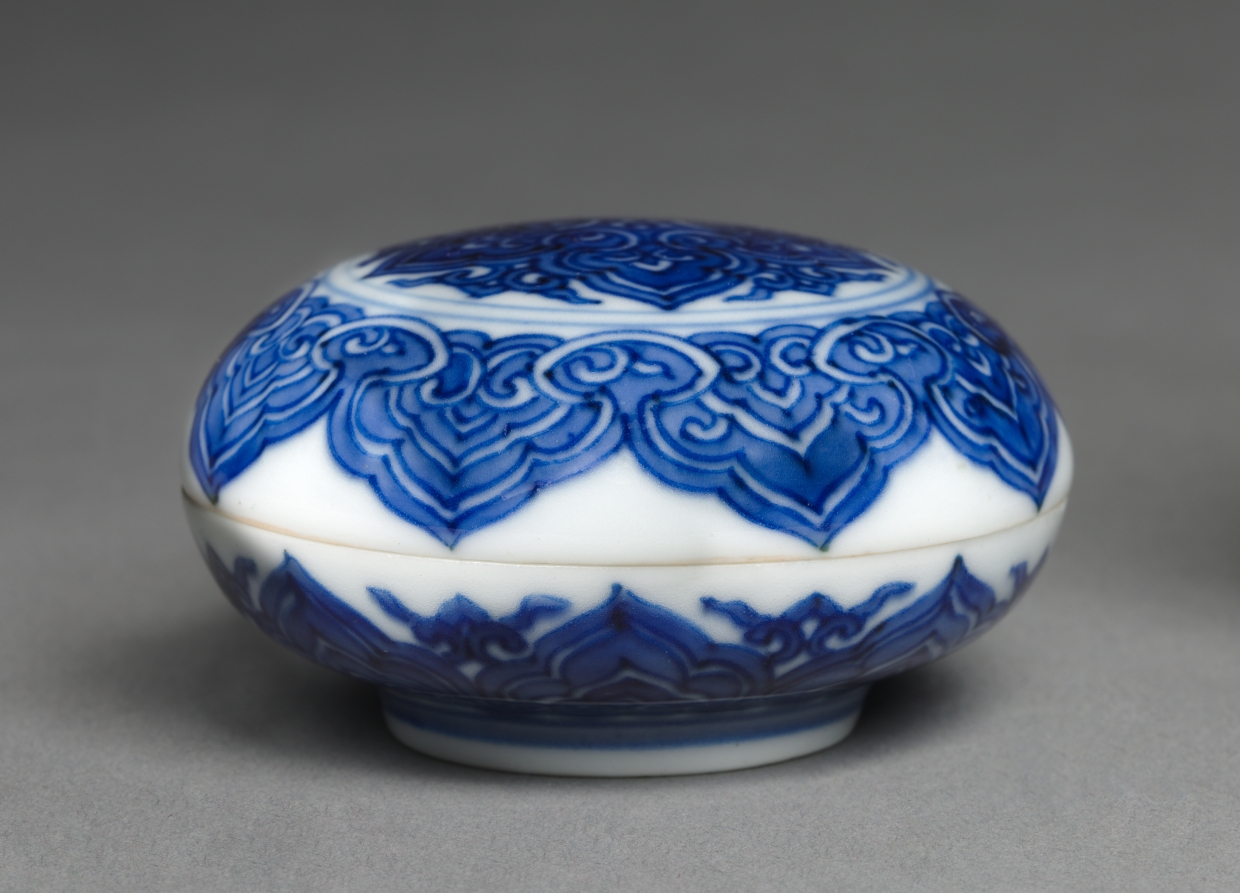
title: Round Covered Box with Medallions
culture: China, Jiangxi province, Jingdezhen kilns, Ming dynasty (1368-1644), Jiajing mark and reign (1522-66)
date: 1522–66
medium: porcelain with underglaze blue decoration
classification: Ceramic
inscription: 大明嘉靖年製